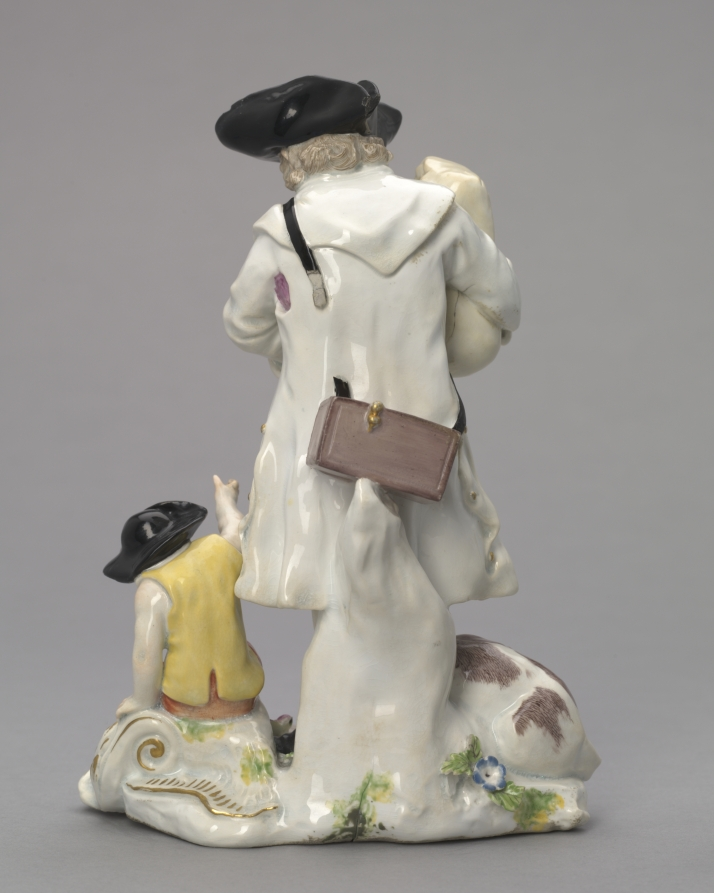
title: The Itinerant Musician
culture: England, Chelsea, 18th century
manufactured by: Chelsea Porcelain Factory (Britain, London, 1745–84)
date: c. 1756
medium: soft-paste porcelain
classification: Ceramic